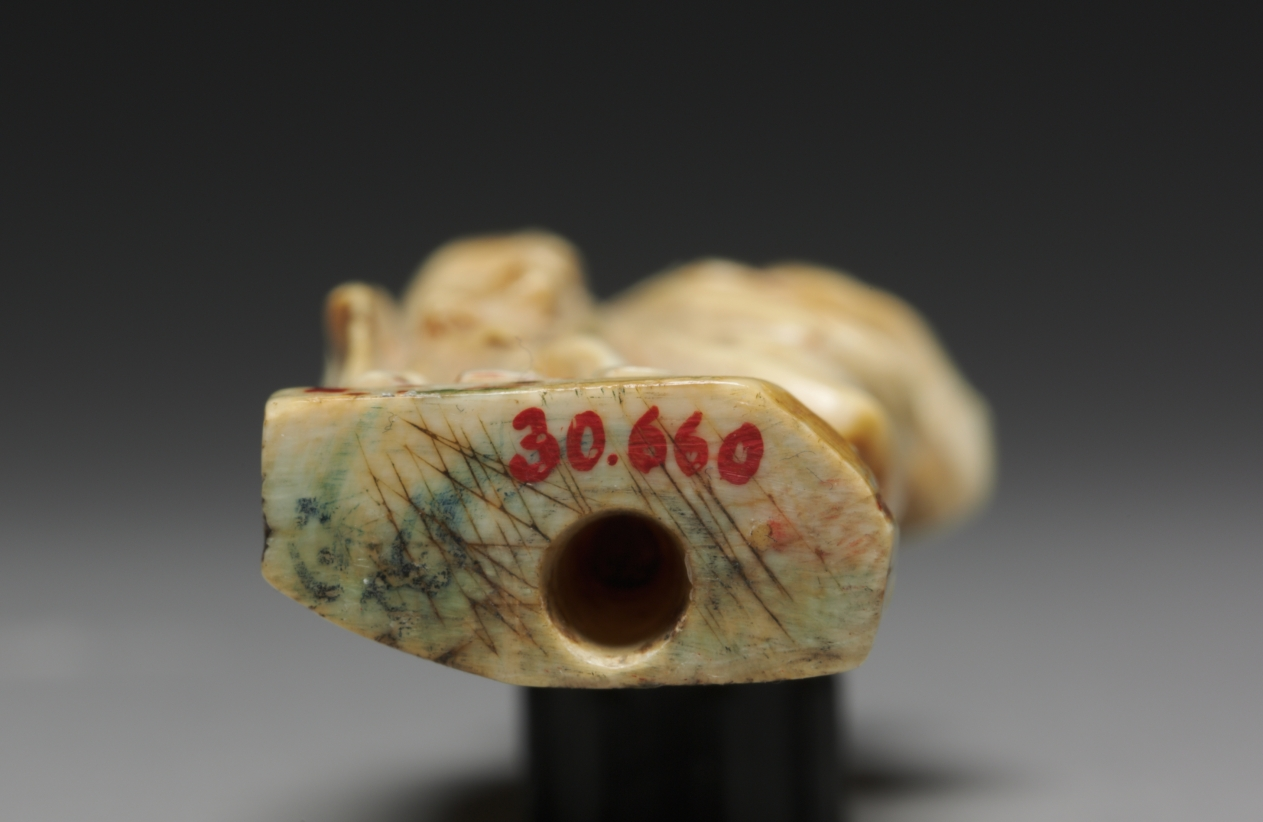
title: Saint John the Evangelist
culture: Germany or Moravia, 14th century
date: c. 1325–1330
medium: ivory with traces of paint and gilding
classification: Ivory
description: This figure with a Virgin and Crucified Christ (now lost) formed a Crucifixion group within a shrine.